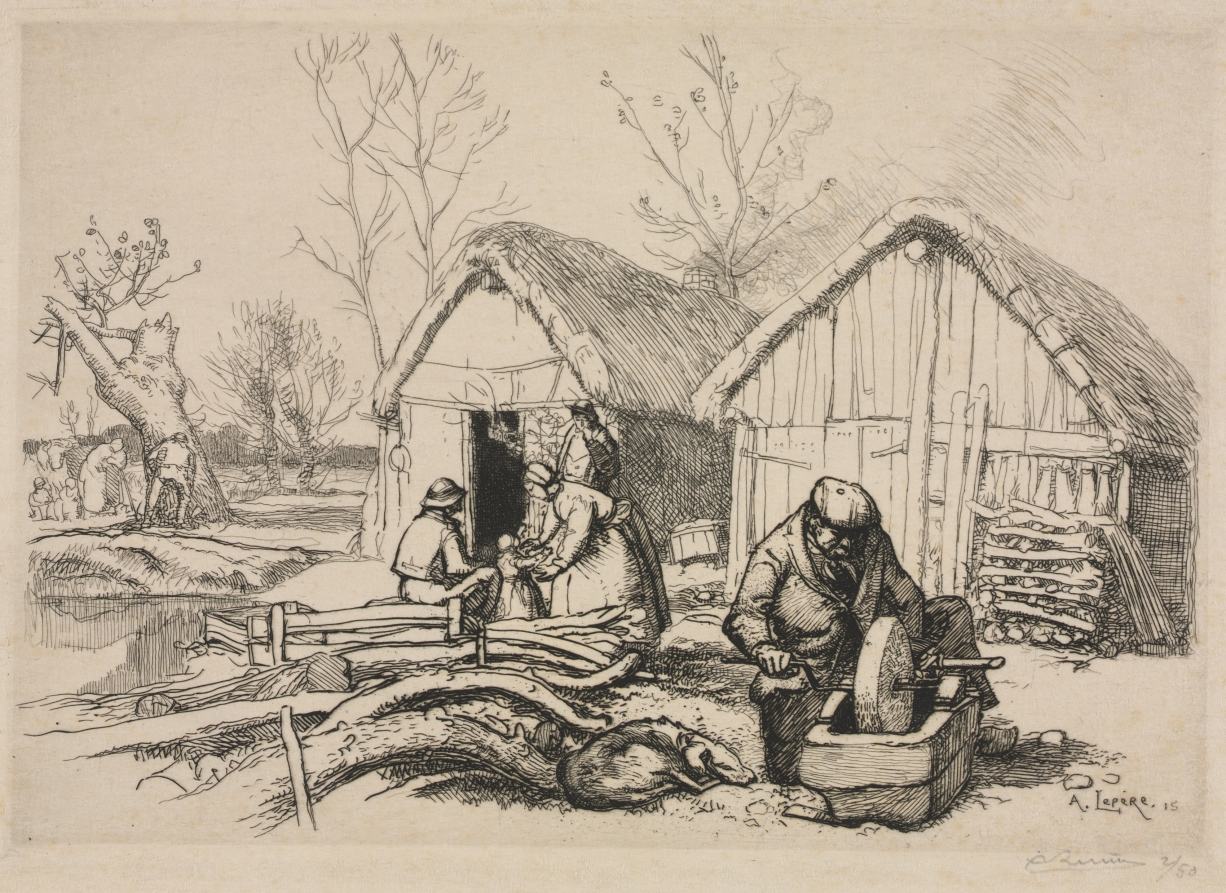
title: The Woodcutter’s House (Vendée)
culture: France, 20th century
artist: Auguste Louis Lepère (French, 1849–1918)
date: 1915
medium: etching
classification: Print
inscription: lower right margin, in pencil: "A Lepere 2/50"